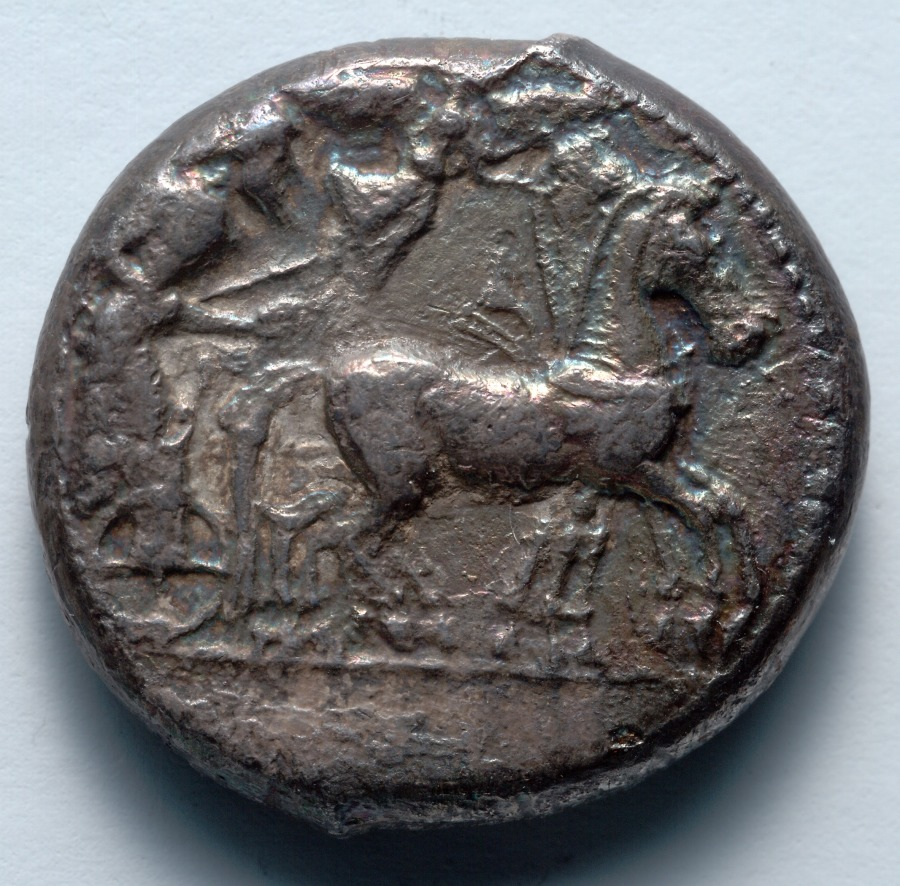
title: Tetradrachm: Quadriga (obverse); Head of Artemis/Arethousa (reverse)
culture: Greek, minted at Syracuse (Sicily)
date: 485–478 BCE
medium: silver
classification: Coins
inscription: [ΣΥΡΑΚ] - ΟΣΙΟ[Ν]